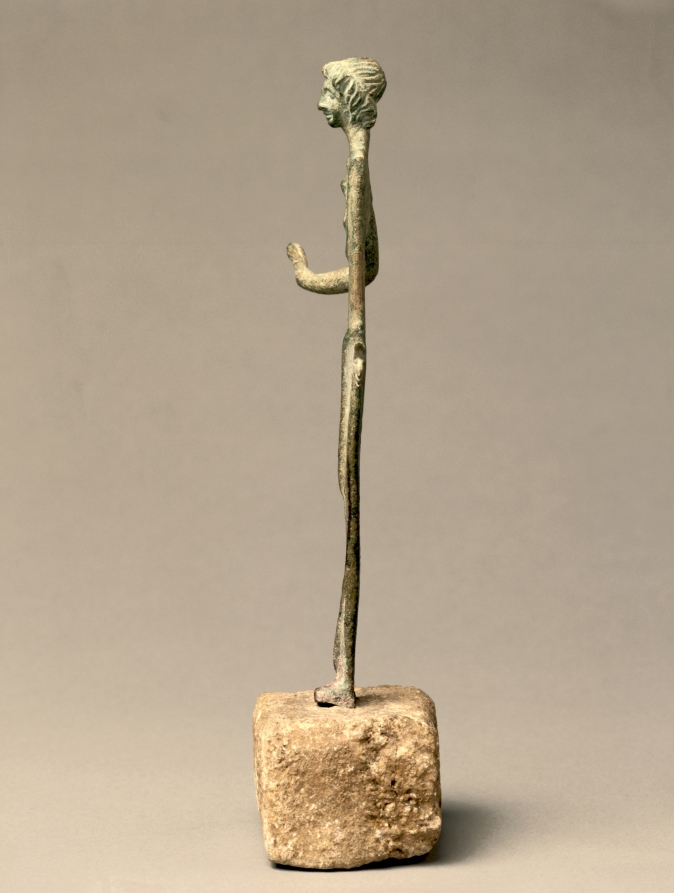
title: Male Votive Figure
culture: Etruscan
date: 300s BCE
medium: bronze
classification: Sculpture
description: This Etruscan votive figure is posed with his hands turned to expose his palms, one near his hip, the other projecting laterally. With the exception of the fully three-dimensional head and the extended right arm and hand, the side profile of this figure is shockingly flat. The tall man’s back is not only extremely thin but also an almost perfectly vertical column. Other examples of this votive figure type are even more elongated, and some hold small cups or libation dishes, as if making offerings. Some scholars have suggested that these votive figures may represent shadows due to their extreme height and relative lack of depth, while others have seen connections to much older traditions of relatively flat cult images, whether of wood or metal.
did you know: This bronze statuette was cast in a single piece.